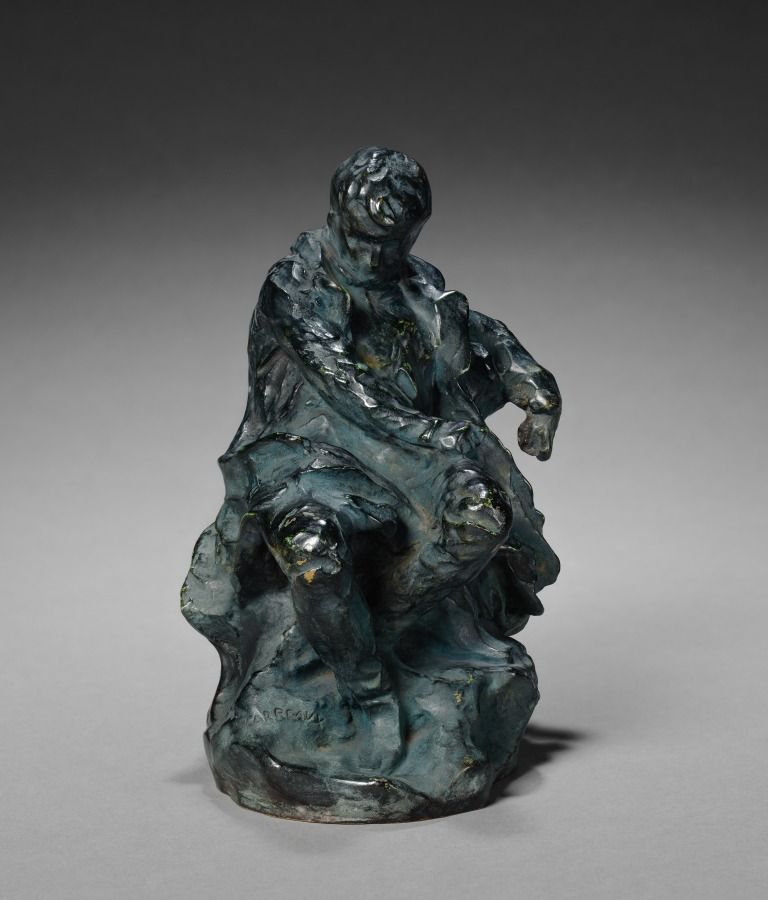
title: Napoleon on St. Helena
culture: France, 19th century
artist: Jean-Baptiste Carpeaux (French, 1827–1875)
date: c. 1860–1870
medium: bronze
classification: Sculpture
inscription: Carpeaux, probably in the wax model, left of Napoleon's foot; on back, an inscription, perhaps the foundry name, has been obliterated with tool marks.